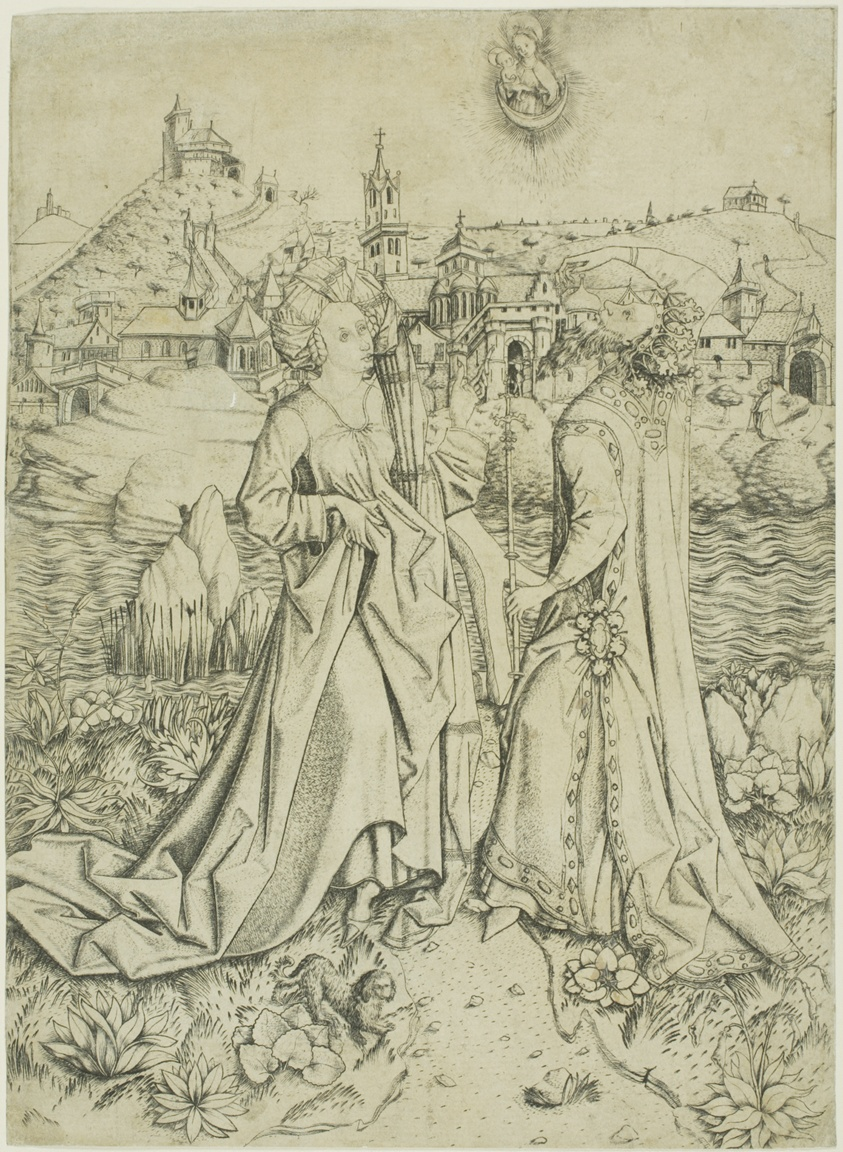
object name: Print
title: Augustus and the Sibyl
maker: Master E. S.; German, active c. 1450-1467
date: c. 1450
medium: Engraving in black on paper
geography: Germany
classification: engraving; print; prints and drawing